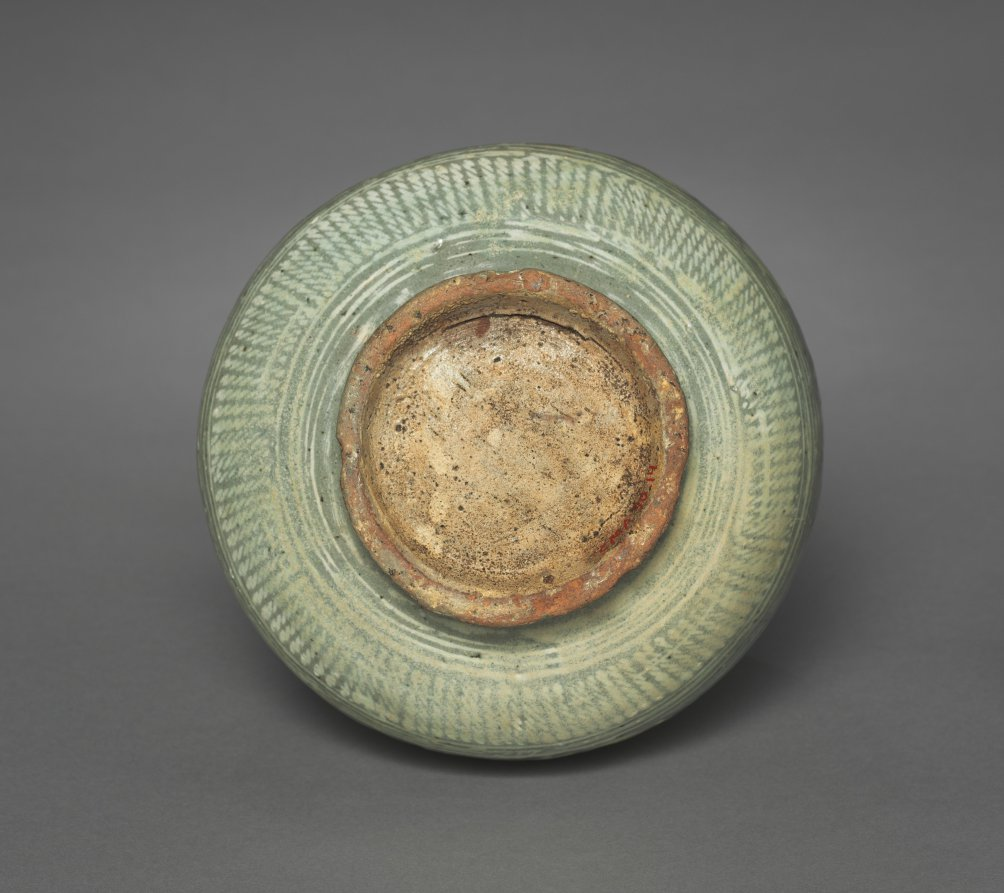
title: Bottle Inlaid with Peony and Scroll Design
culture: Korea, Joseon dynasty (1392–1910)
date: 1400s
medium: stoneward with inlaid, incised, and sgraffito design (Buncheong ware)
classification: Ceramic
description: Produced in both central and provincial kilns during during the 1400s–1500s, Buncheong (literally means "powdered green"), like this wine bottle commonly feature gray-green glaze due to the usage of less processed and refined clay high in iron. Many experimental techniques: white slip, inlay, stamping, and incising, which had been explored and perfected by Goryeo-period artists, were also adopted for bucheong pottery, yet resulting bold and whimsical visual impacts, completely different from elegant and refined Goryeo celadons.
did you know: The term buncheong, which refers to this type of pottery, means "powdered gray-green glazed ceramics.”